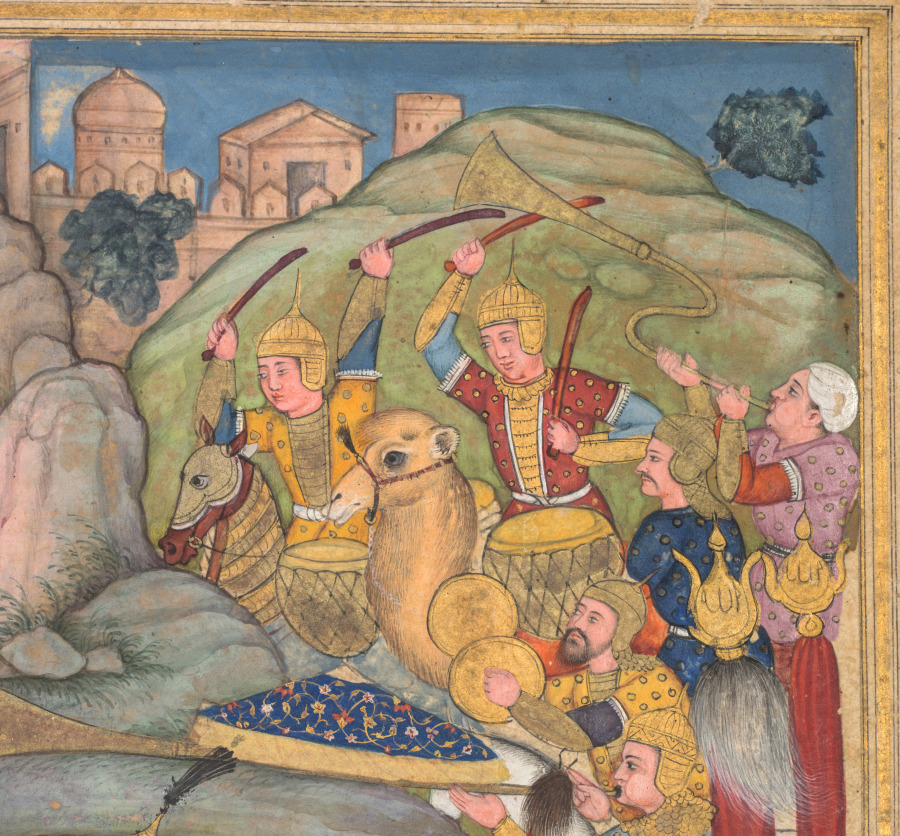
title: Mughal ruler Humayun defeating the Afghans before reconquering India, folio from an Akbar-nama (Book of Akbar) of Abu’l Fazl (Indian, 1551–1602)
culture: Mughal India, court of Akbar (reigned 1556–1605)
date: c. 1590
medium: Gum tempera, ink, and gold on paper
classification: Painting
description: In a battle that took place in 1555, the second Mughal emperor, Humayun, reconquered northern India from the Afghans with the help of Iranian military forces. His mounted figure stands out from the fray, with his golden helmet and red tunic silhouetted against a hillside in the upper center of the composition. To illustrate the beginning of hisown biography, Humayun’s son Akbar included this image of his father riding victoriously back to India. The scene never actually occurred in this way, since Humayun did not participate in this particular battle; his inclusion here is symbolic.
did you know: A well-trained war elephant can pull an opponent off his horse with its trunk.